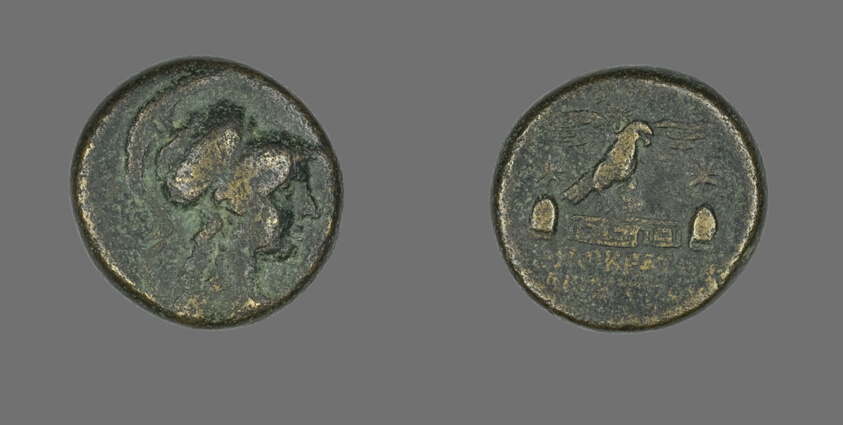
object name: Coin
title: Coin Depicting the Goddess Athena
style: greek, ancient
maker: Greek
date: 133-48 BCE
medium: Bronze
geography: Ancient Greece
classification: coin; ancient art